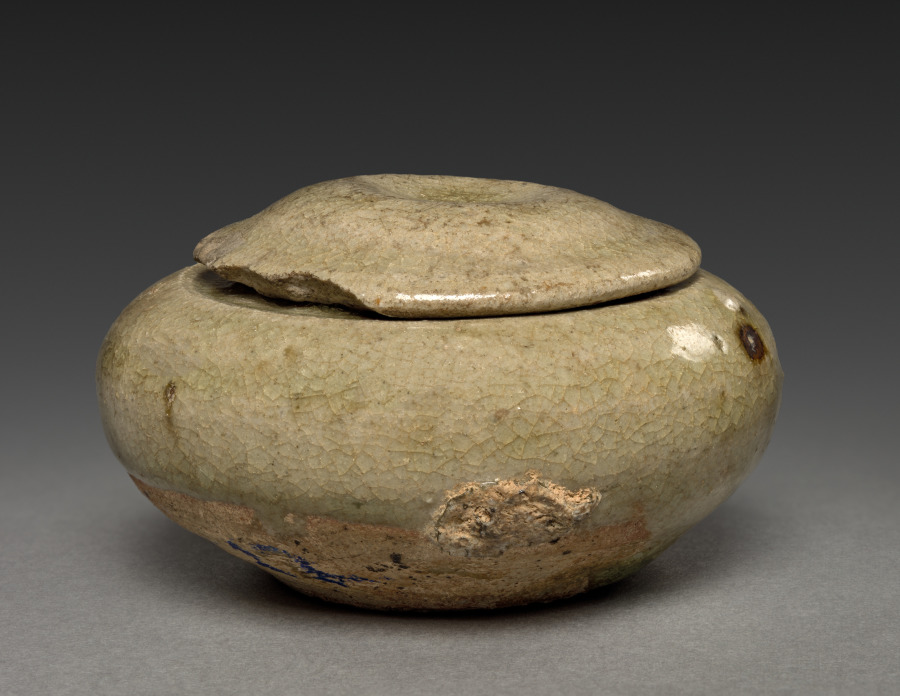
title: Incense Box: Seto Ware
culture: Japan, Kamakura period (1185–1333)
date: 1200s–1300s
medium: glazed stoneware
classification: Ceramic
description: Old Seto, also called Koseto ware, was typically coated with an ash glaze in the mineral feldspar, which produced a yellow or grayish-green glaze. This palette appealed to medieval Buddhist priests and samurai alike. The practice of burning incense in religious, court, and domestic settings dates from the early 700s in Japan.